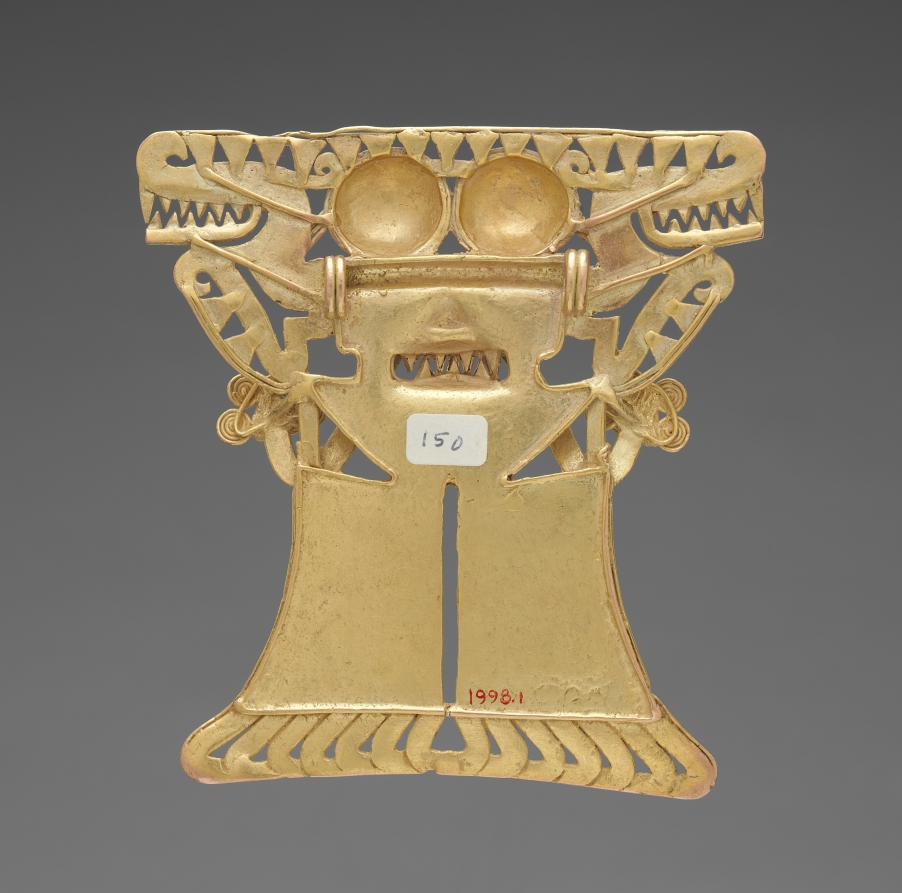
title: Animal-Headed Figure Pendant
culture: Panama, Veraguas or Parita style, c. 1000-1550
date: c. 1000–1550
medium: cast gold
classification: Metalwork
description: The culture area that extends from southern Central America to northern South America is generally referred to as the Intermediate Region because of its location between the two high culture zones of Mesoamerica and the central Andes. Research to date indicates that the pre-Columbian peoples of the Intermediate Region were organized into small, competitive chiefdoms, rather than large-scale states or empires. Despite political competition and warfare, trade in prestige goods such as jade and gold was common. Gold, obtained through panning and mining, was worked by hammering and lost-wax casting to produce intricate and showy personal ornaments. The pendant represents a supernatural being, perhaps a fantastic crocodilian. It has projecting, tubelike eyes, a snout full of sharp teeth, and snake-headed streamers emanating from the nostrils. The simplified lower body consists of broad, flat legs, with large, curved talons at the ends of the feet. The elaborate headdress includes two central semidomes, flanked by fierce-looking profile crocodilians.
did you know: The figure wears an elaborate headdress that is flanked by fierce-looking crocodilians in profile.